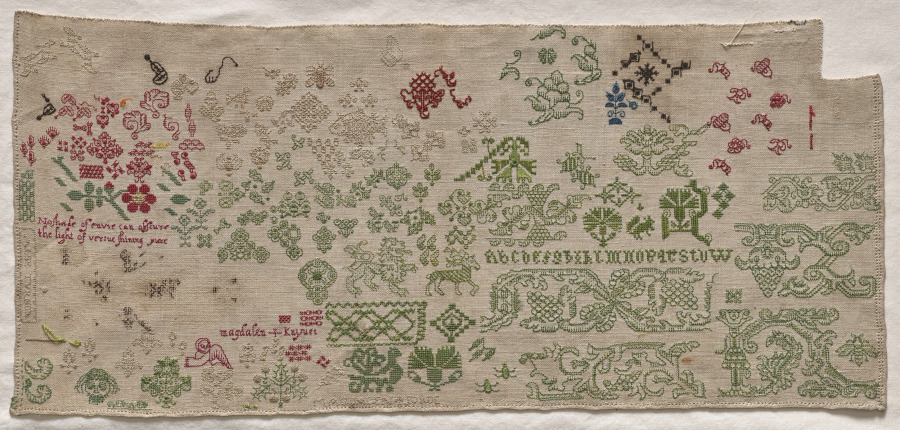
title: Sampler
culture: England, 17th century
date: 1600 – 1630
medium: embroidery: silk on linen tabby ground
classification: Sampler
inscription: alphabet through W; "Alse Turnor"; "Magdalen + Kuynet"; "Madgalen Forde"; and the verse: "No shade of envie can obscure the light of vertue shining pure."`